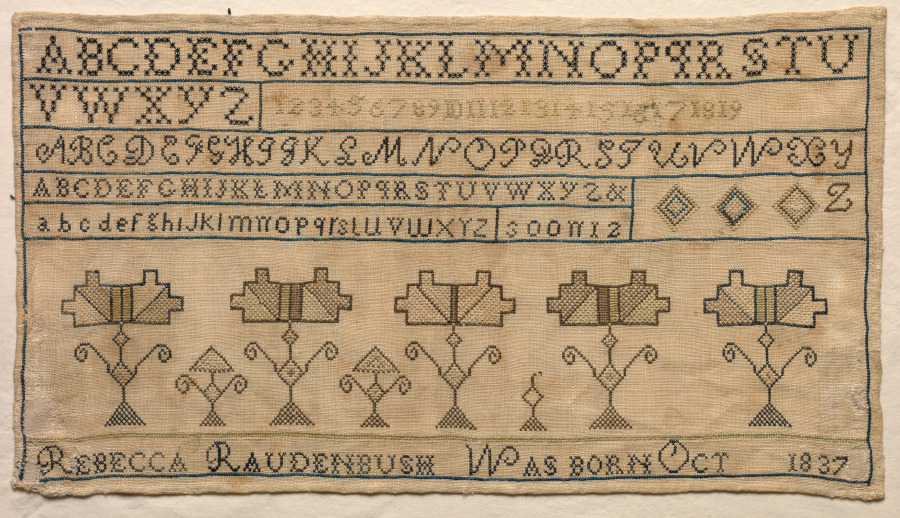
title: Sampler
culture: America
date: 1837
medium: embroidery; silk on linen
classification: Sampler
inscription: alphabet in four types and a set of numerals; Inscription reads: "Rebecca Raudenbush was born Oct. 1837."